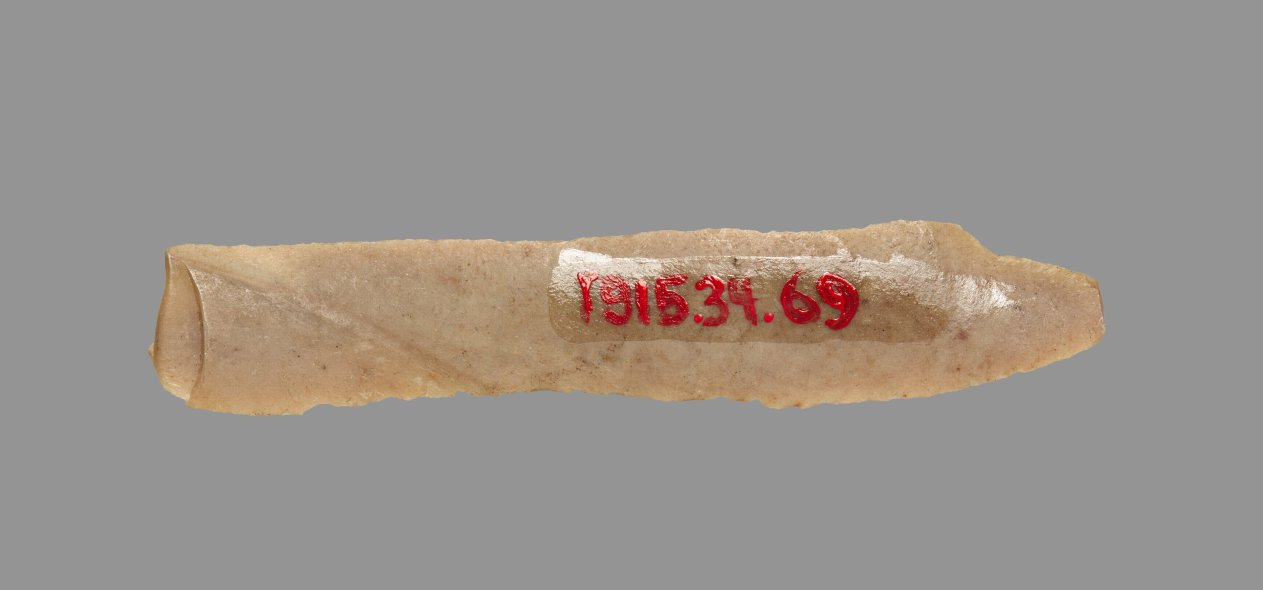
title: Sickle Blade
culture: Egypt, Middle Kingdom (2040–1648 BCE), Dynasty 12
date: 1980–1801 BCE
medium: flint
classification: Implements